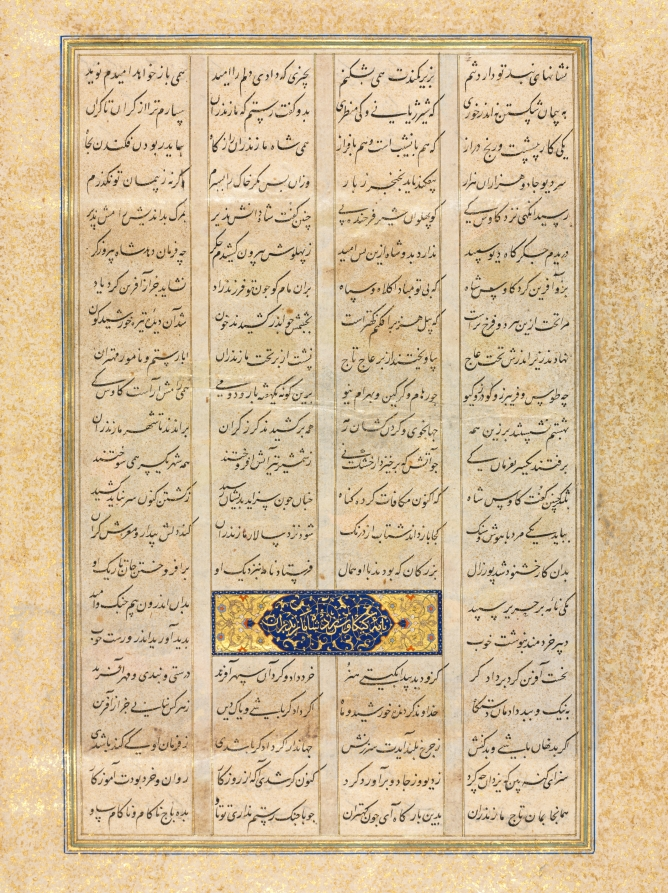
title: Page from a Shah-nama (Book of Kings) of Firdausi (Persian, about 934–1020)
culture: Iran, Tabriz, Safavid period (1501-1722)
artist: attributed to Mir Musavvir (Iranian, c. 1510–1555)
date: 1520–37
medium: Gum tempera, ink, gold, and silver on paper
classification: Manuscript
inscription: Script: Nasta'liq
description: Begun at the end of the reign of Shah Ismail (reigned 1501–24), first king of the Safavid dynasty of Iran, this copy of the Shah-nama (Book of Kings) was completed during the reign of his son Shah Tahmasp. Unparalleled in scope and refinement, the book included 259 paintings by master artists in the royal workshop. Two calligraphers copied the text in an elegant, flowing nasta‘liq script. In 1568, Shah Tahmasp gave this book as a gift to the Ottoman sultan Selim II of Turkey.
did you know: The 50,000 rhyming couplets of the Shahnama tell the story of ancient kings of Iran.